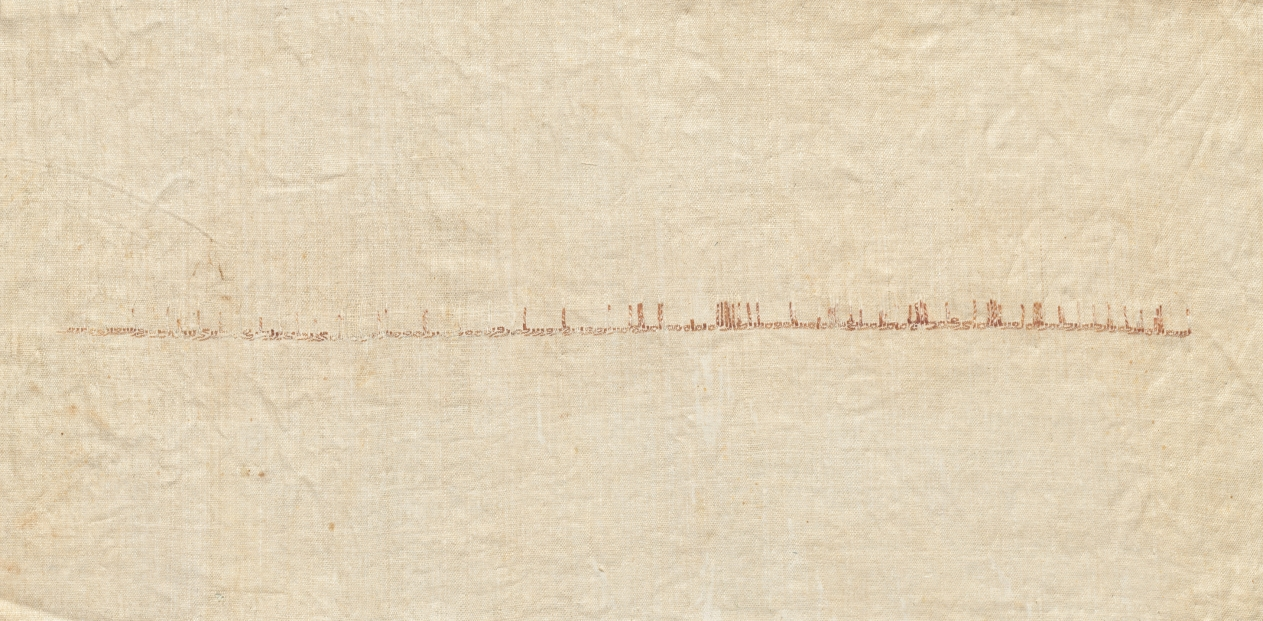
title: Fragment of a Tiraz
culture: Egypt, Tulunid period, Reign of emir Harun b. Khumarawayh, under the Caliphate of al-Muktafi, AH 291 (A.D. 903-904)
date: 903 – 904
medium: tabby ground with inwoven tapestry inscription; linen and silk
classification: Embroidery